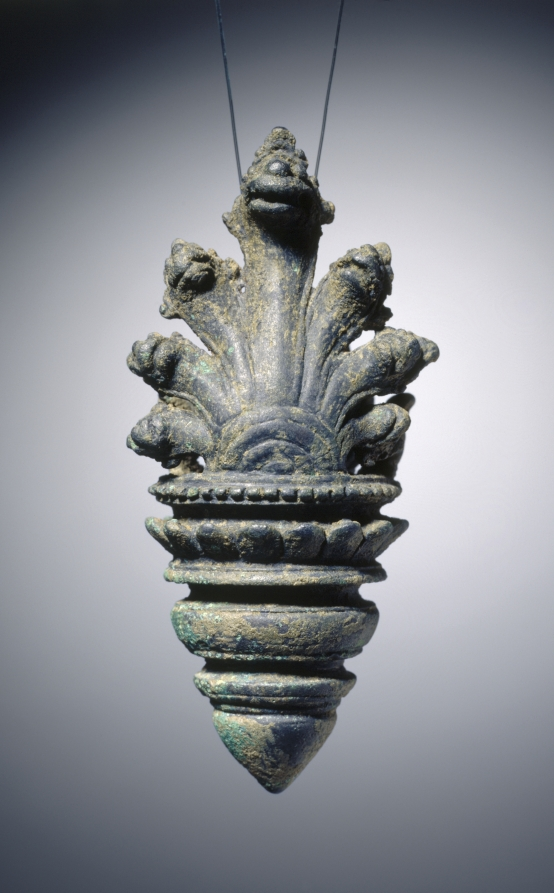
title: Earring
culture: Cambodia, Angkorean Period (877-1431)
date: c. 1100s–1200s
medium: bronze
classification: Jewelry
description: Earrings that were cast in bronze and then gilded (on this example, the gilding has worn off) were attached to the stone sculptures themselves. The serpent, a Khmer national emblem, was used frequently as an ornamental motif. The historical Buddha Shakyamuni was born a prince in northern India in the late 500s BC, and he wore heavy earrings that dragged down his earlobes. When he renounced worldly life to seek enlightenment, he cast off all his jewels. Generally, Buddha images have elongated earlobes without earrings, while bodhisattvas—beings close to full enlightenment—wear princely jewels in reference to Shakyamuni’s princely life just before he became a Buddha. By the early 1200s in Cambodia, however, these categories had become more nuanced: the bodhisattva Lokeshvara was viewed as such a potent figure he was sometimes called a Buddha and images of some special Buddhas other than Shakyamuni were distinguished by their jewelry.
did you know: This earring is topped with the form of a naga, a water serpent with a multi-headed hood.